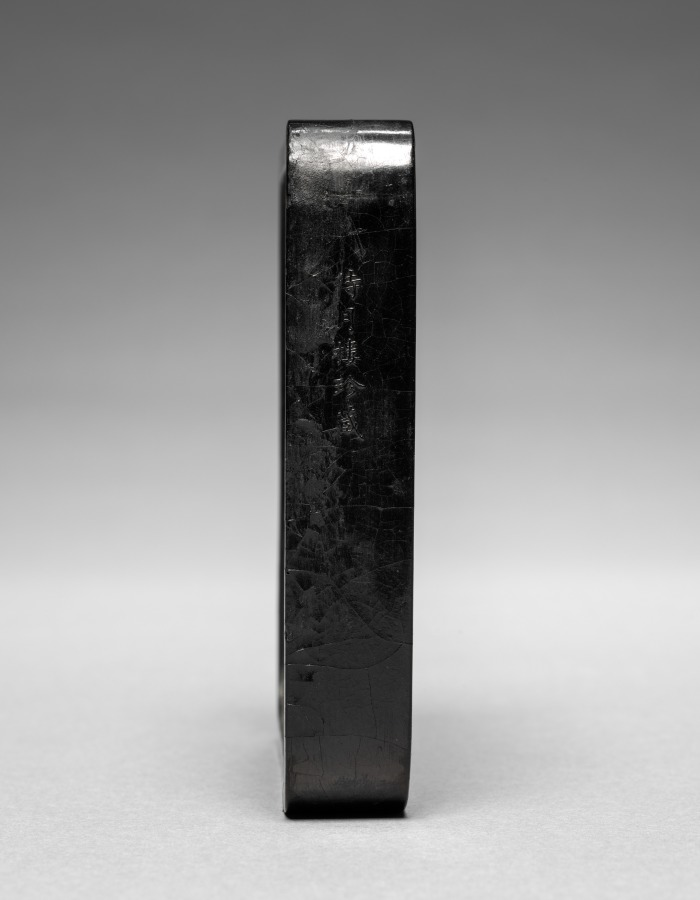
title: Ink Cake with Architectural Design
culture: China, Qing dynasty (1644-1911), Qianlong inscription, mark, and reign (1736-95)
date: 1736–95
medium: molded ink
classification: Miscellaneous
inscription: 大清乾隆年制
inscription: 待月樓珍藏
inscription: 御墨. 光分太乙. 吟詠春風里.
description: In China, access to political power was granted to those who passed the civil service examinations, a system that offered official service only at a high level of education. Chinese literati-officials, whose daily routine involved administrative work in an office, enjoyed precious objects on their writing desks that offered distraction and demonstrated good taste. By the Ming (1368–1644) and Qing (1644–1911) dynasties, these utensils of the literati studio also became collectibles and were treasured as artworks.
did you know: To make liquid ink, an ink cake is ground against an inkstone with a small quantity of water.